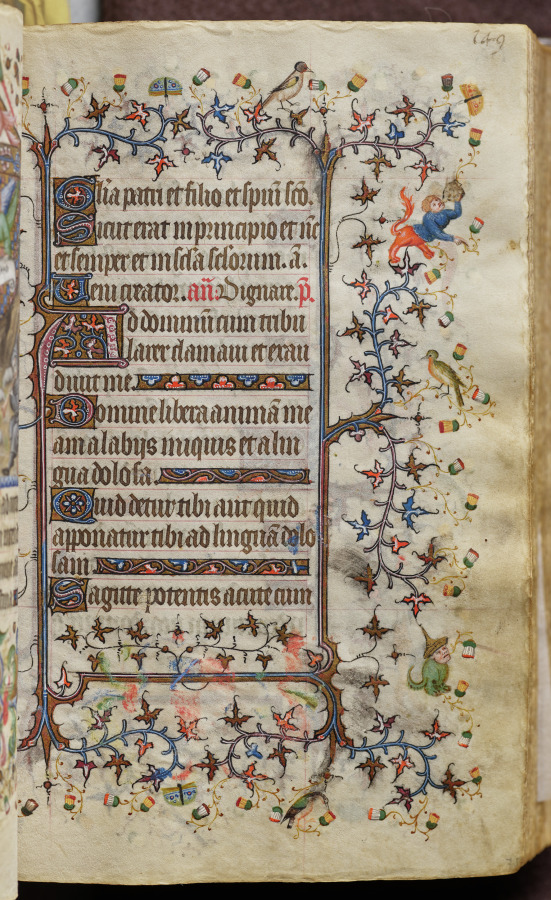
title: Hours of Charles the Noble, King of Navarre (1361-1425): fol. 75r, Text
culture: France, Paris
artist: Master of the Brussels Initials and Associates (French)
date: c. 1405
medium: ink, tempera, and gold on vellum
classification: Bound Volume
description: This precious volume was obviously highly prized by its owner, the French-born King of Navarre, who had his coat of arms painted on no less than twenty folios. Rather than directly commissioning this manuscript from a specific workshop, it seems that Charles the Noble acquired his book of hours -- perhaps ready-made for the luxury market -- while on a trip to Paris in 1404-05. A collaborative effort, six painting styles are evidenced within the pages of this codex, those of two Italians, two Frenchmen, and two Netherlanders. The painter who was responsible for the planning and decoration of the book, and who produced seventeen of the large miniatures, was a Bolognese artist known as the Master of the Brussels Initials. His principal assistant, responsible for most of the borders, was a Florentine who signed his name "Zecho" da Firenze on folio 208 verso.